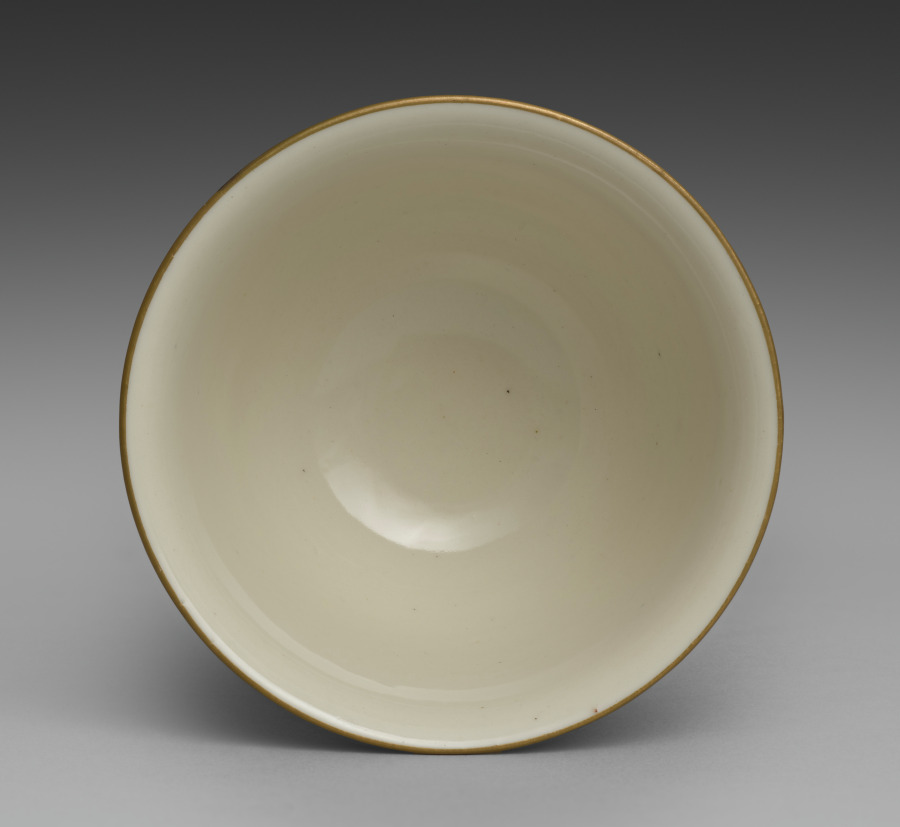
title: Drinking Cup from Dining Set with Plum Blossoms and Cracked-Ice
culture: Japan, Meiji period (1868–1912)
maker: Seifū Yohei II (Japanese, 1844–1878)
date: c. 1875–78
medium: Porcelain with molded designs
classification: Ceramic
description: Each item in this set has a delicate low-relief design of flowering plum branches over scattered, intersecting lines meant to resemble the cracked-ice surface of a frozen body of water and is signed on the base in gold pigment. While Yohei II produced many fine works in underglaze blue, like those produced by Kiyomizu Shichibei, he also made works in quite different styles later in his career, from the early 1870 s. In 1873, he was appointed purveyor to the Industrial Center of Kyoto Prefecture, a designation associated with Kyoto’s efforts to reach an international market through the port of Kobe; and from 1875 until his death, he was involved in national-level projects to present Japanese ceramics across the world. It was during this period that Yohei III was apprenticed to Yohei II, and it has been suggested that this set may in fact be an early example of Yohei III’s work, which he signed with his teacher’s name. Decorated with flowers resembling Japanese textile motifs, the set calls to mind the design of Yohei II’s pair of vases with plum blossoms in the Victoria and Albert Museum. Here, the elaborate trees created for a formal public exhibition setting have been translated into the approachable blossoms of the genteel domestic environment. While the designs are consistent across the pieces, each raised flower petal and pistil and each incised line in the ice was done by hand, so the cups, bowls, and dishes are similar yet unique. The bottoms of two boxes once identified the set’s owner, but the information has been deliberately obscured with black ink. However, inscriptions still visible appear to indicate two occasions, once at the end of July 1886 , and once again in June 1916 , when parts of the set were requested from Hokura in Niigata Prefecture. The location corresponds to a neighborhood in the present-day city of Jōetsu. The surname Tsuji 辻 also appears on a paper tag affixed to one of the box cloths. Future research may possibly reveal more about their provenance. A vase by Yohei III in a private collection combines the formal grandeur of the Yohei II vases in the Victoria and Albert Museum with the gentler design of this dining set, placing flowering plum trees against soft, scalloped-edge clouds resembling those in golden screens.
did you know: The dining wares have a creamy white coloration that the four boxes containing them identify as Korean in style.